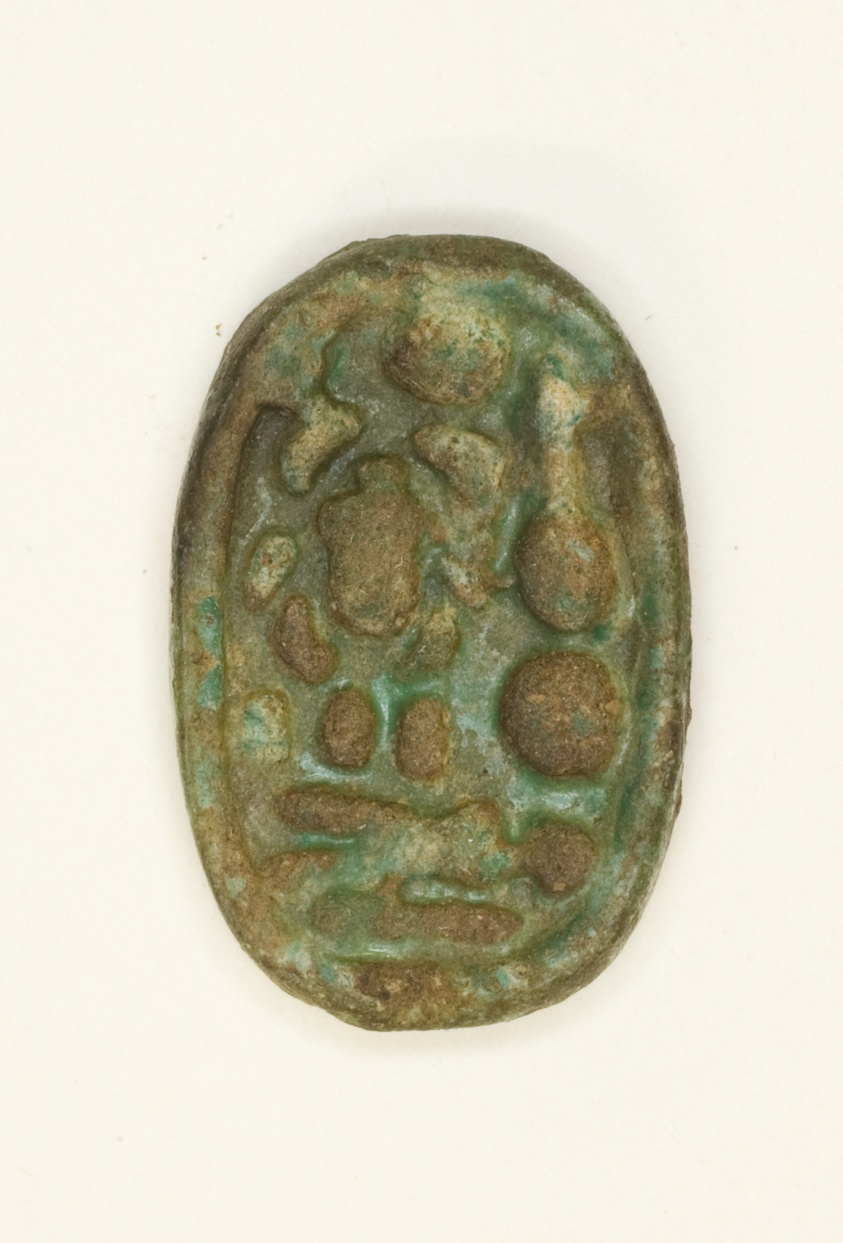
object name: Costume and Accessories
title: Ring: Neferkheprure-Waenre (Akhenaton)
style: amarna period, eighteenth dynasty, new kingdom, egyptian, ancient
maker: Egyptian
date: New Kingdom, Dynasty 18, reign of Akhenaten (about 1352–1336 BCE)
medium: Faience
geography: Egypt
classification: ring (jewelry); ceramics; jewelry; ancient art; costume; faïence (composite material)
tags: Hieroglyphs